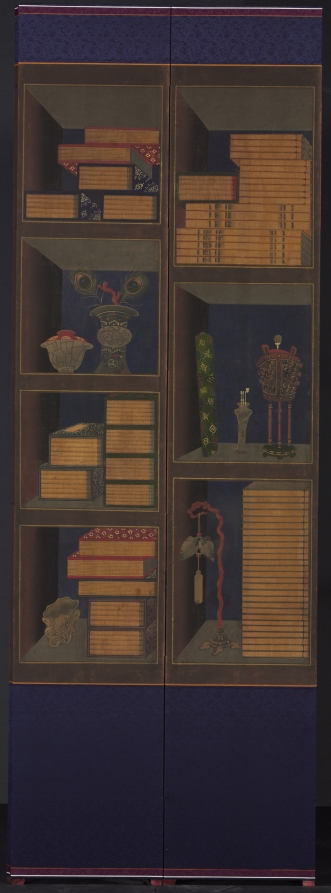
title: Books and Scholars’ Accoutrements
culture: Korea, Joseon dynasty (1392–1910)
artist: Yi Taek-gyun (Korean, 1808–after 1883)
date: late 1800s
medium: ten-panel folding screen; ink and color on silk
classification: Painting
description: First produced around the second half of the eighteenth century, chaekgado (literally, “pictures of bookshelves”) flourished throughout the 1800s as a royal emblem. And soon this pictorial genre became a popular furnishing item for aristocrats' elegant studies. The third panel from the right bears a hidden seal that reveals the artist: Yi Taek-gyun, a prominent court artist active in the late 1800s.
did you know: A convincing hypothesis that connects the Korean chaekgado tradition with the Renaissance tradition of illusionistic studiolo through the technique of trompe-l'œil and Chinese Qing period treasured cabinet paintings was first made in Park Shim-eun's thesis (2002).